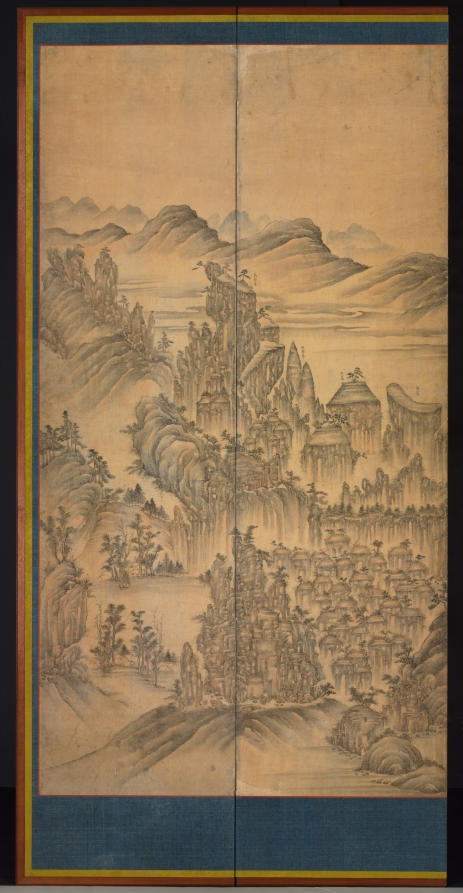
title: Seven Jeweled Mountain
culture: Korea, Joseon dynasty (1392–1910)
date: late 1800s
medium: ten-panel screen; ink and color on silk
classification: Painting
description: With a bird’s-eye view, this ten-panel folding screen portrays the famous Seven Jeweled Mountain 칠보산 in North Korea. Ancient volcanic eruptions shaped the mountain’s unique and awe-inspiring terrain such as phallic-shaped pillars (panel #5, from the right); a large flat-topped, steep-sided cliff (panels #7 and #8), and a rugged mountain composed of metamorphic and igneous rocks (panels #9 and #10). The tradition of landscape painting that details actual natural sites and captures their topographic features in Korea began in the 1700s and continued onward. While such natural wonders were beloved as popular destinations for tourism and pilgrimage, after the Korean War (1950–53), these sites in North Korea are no longer accessible to the outside world. This folding screen detailing the mountain’s distinctive topography feeds our imagination and longing for such an unattainable place.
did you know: Featuring a spectacular panoramic view and topographical details, this ten-panel folding screen is an excellent 19th-century version of the Korean “true-view” landscape painting tradition.